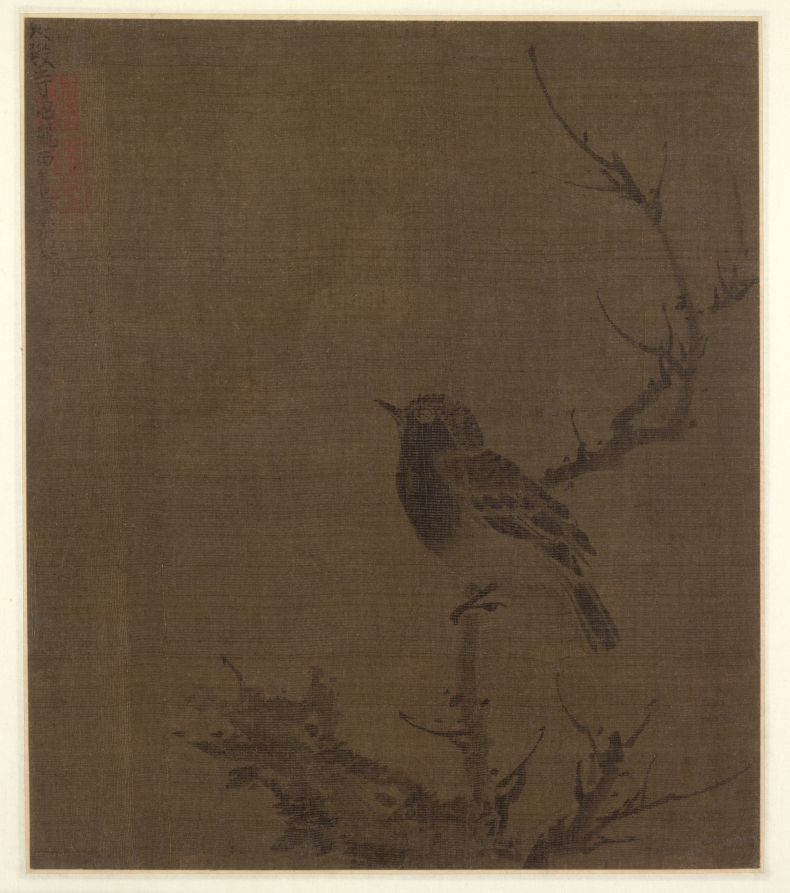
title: Sleeping Bird on a Prunus Branch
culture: China, Ming dynasty (1368–1644)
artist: Bian Wenjin (Chinese, about 1354–1428)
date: 1400s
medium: album leaf; ink on silk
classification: Painting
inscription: Artist's inscription, signature, and 2 seals: Painted by Pien Ching-chao of Lung-hsi, painter-in-attendance of [Wu]-ying-tien. [seals] I-ch'ing-tung-chih; Pien shih Wen-chin